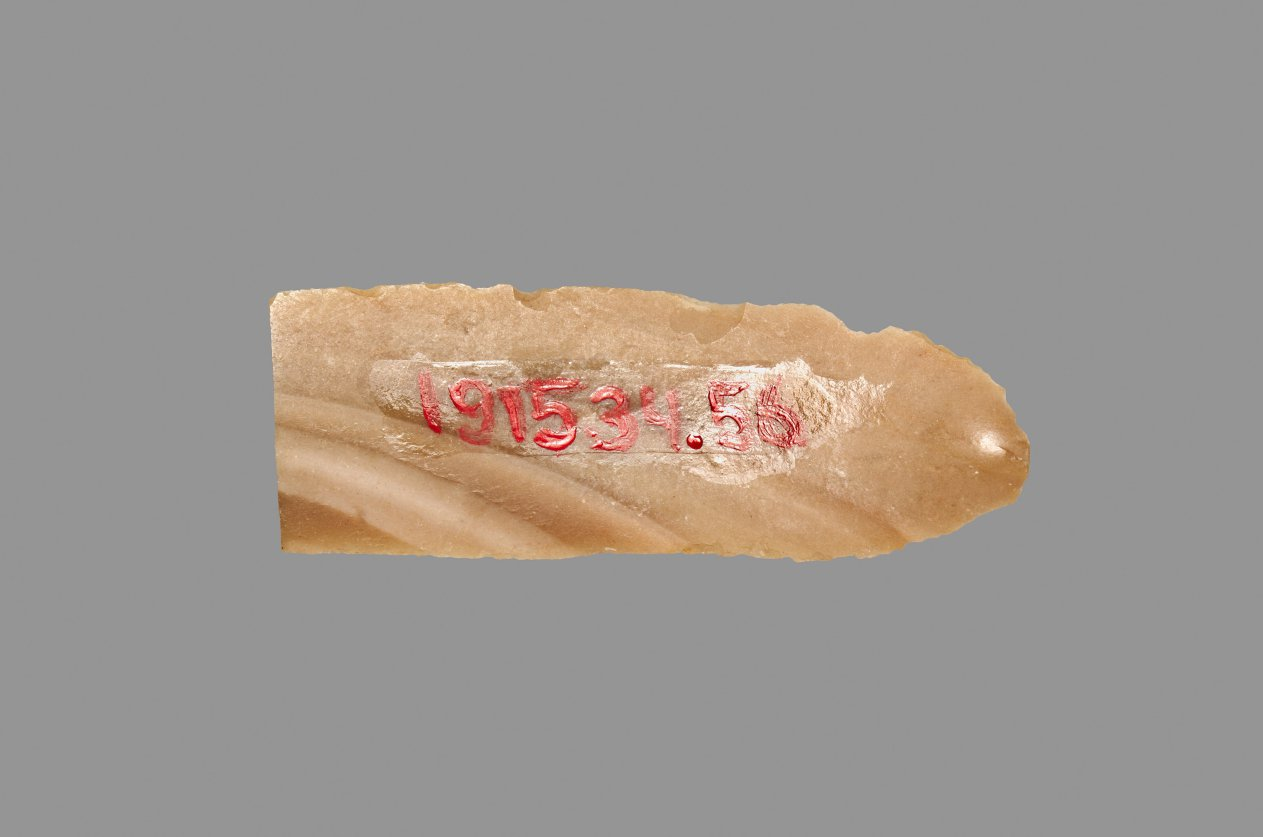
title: Sickle Blade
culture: Egypt, Middle Kingdom (2040–1648 BCE), Dynasty 12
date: 1980–1801 BCE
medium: flint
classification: Implements